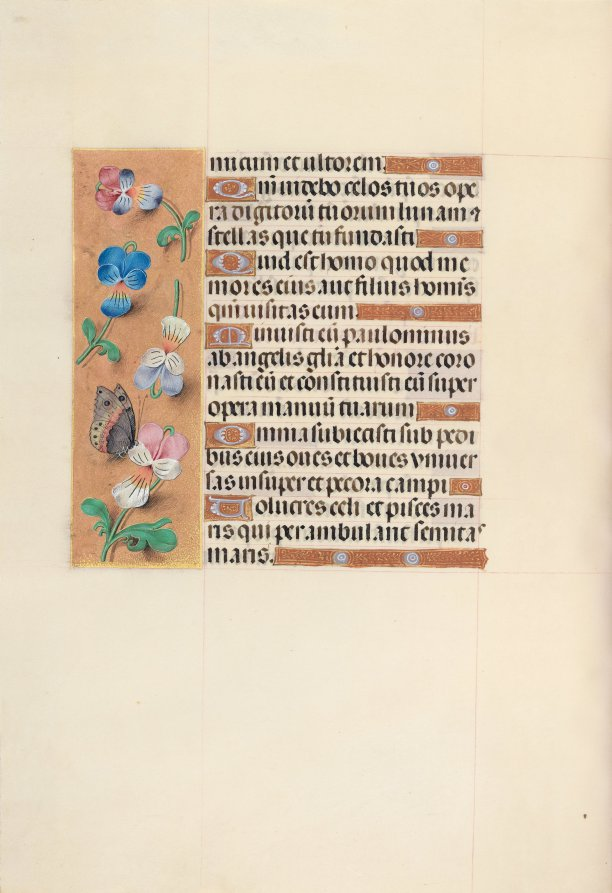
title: Hours of Queen Isabella the Catholic, Queen of Spain: Fol. 100v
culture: Flanders, Ghent and Bruges, late 15th century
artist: Master of the First Prayerbook of Maximillian (Flemish, c. 1444–1519)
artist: and Associates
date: c. 1500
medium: ink, tempera, and gold on vellum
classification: Bound Volume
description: This manuscript was illuminated by a circle of at least five highly organized manuscript painters active in the Flemish cities of Ghent and Bruges. The principal illuminator was Alexander Bening, who painted the majority of the book's miniatures. Manuscripts produced by this circle of artists are renowned for the decoration of their borders, which typically feature a rich variety of realistically-painted flowers, birds, and butterflies. This prayer book, called a book of hours, was intended not for a cleric, but for the private devotions of a lay person-in this case, Isabella the Catholic, Queen of Spain (1451-1504). Isabella's coat of arms embellishes the book's frontispiece. It is unlikely that the book was commissioned by the Queen herself; rather, she probably received it as a diplomatic gift from someone courting her patronage, perhaps Cardinal Francisco Jimenez de Cisneros. A Franciscan friar, Jimenez was dependent upon Isabella for his advancement, first to the post of Queen's confessor in 1492, and then to Archbishop of Toledo in 1495.